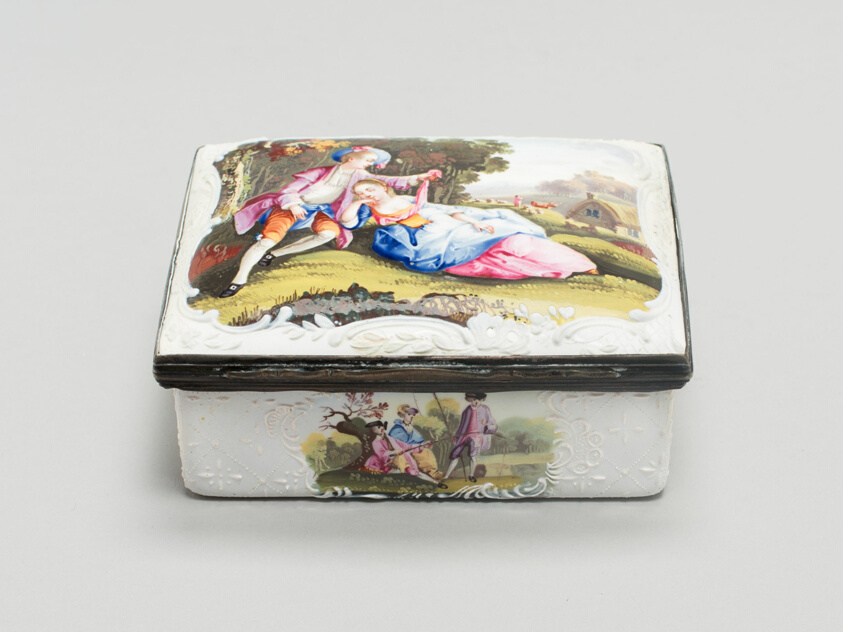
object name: Metalwork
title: Box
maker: Wednesbury, England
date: c. 1790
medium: Metal and enamel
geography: Wednesbury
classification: enamel; metalwork